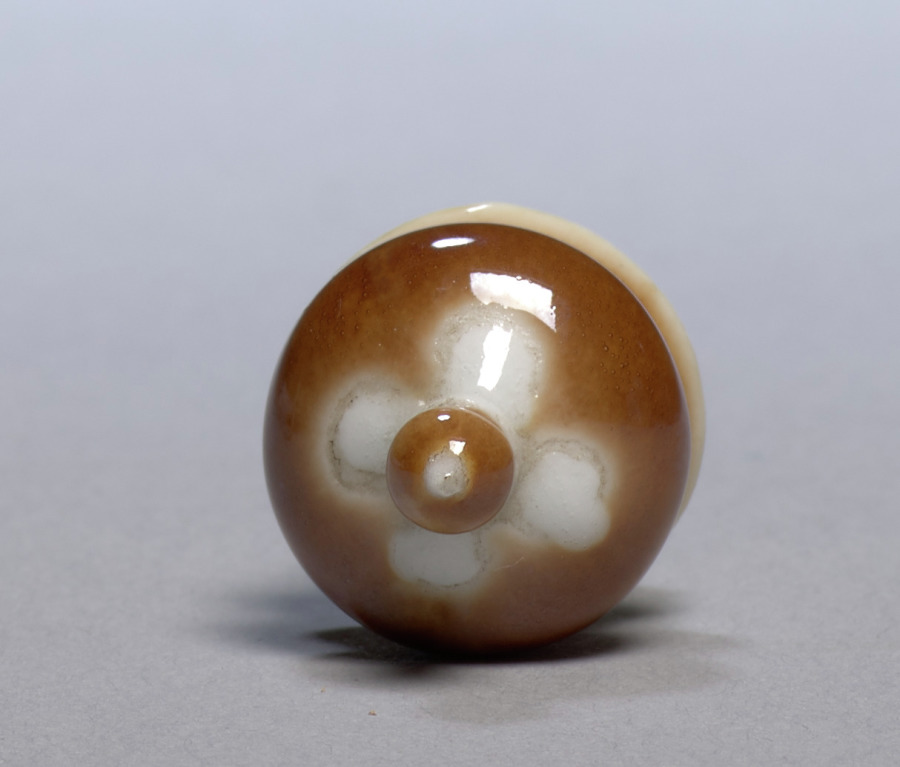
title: Cover for a Vase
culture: France, 20th century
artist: Sèvres Porcelain Factory (French, est. 1756)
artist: Taxile Maximin Doat (French, 1851–1939)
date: 1901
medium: porcelain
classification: Ceramic